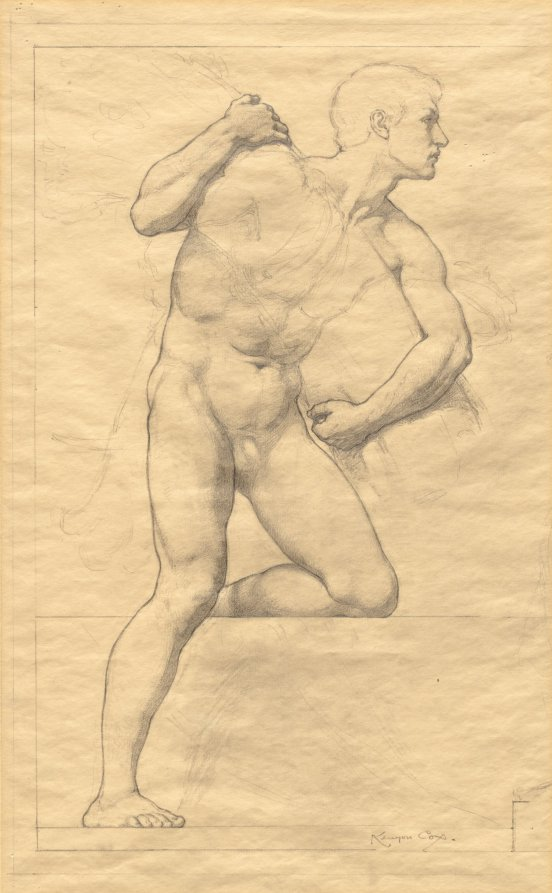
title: Sketch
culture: America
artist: Kenyon Cox (American, 1856–1919)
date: 1912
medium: graphite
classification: Drawing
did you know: This drawing is a preparatory sketch for United States currency, proposed during President Taft's administration.